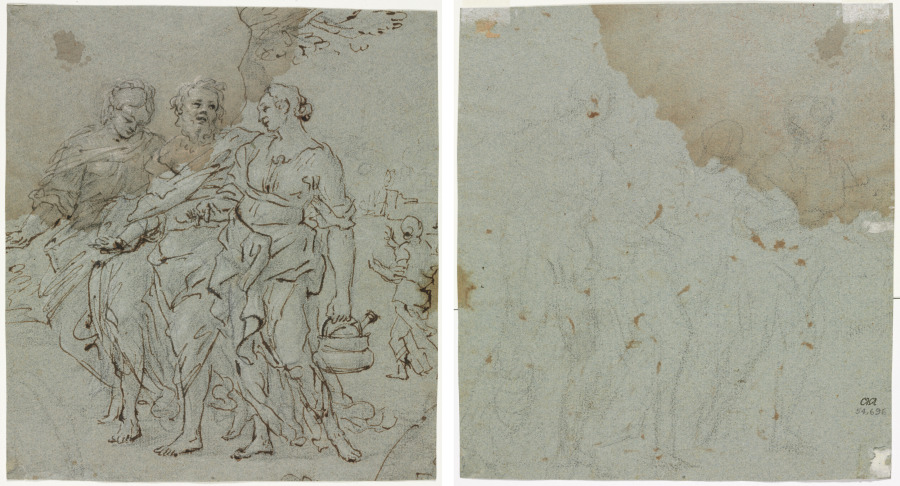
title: Lot and His Daughters (recto); Sketch for Lot and His Daughters (verso)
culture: Italy, 17th century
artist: circle of Pietro da Cortona (Italian, 1596–1669)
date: 1600s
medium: pen and brown ink over black chalk(?), heightened with traces of white gouache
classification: Drawing